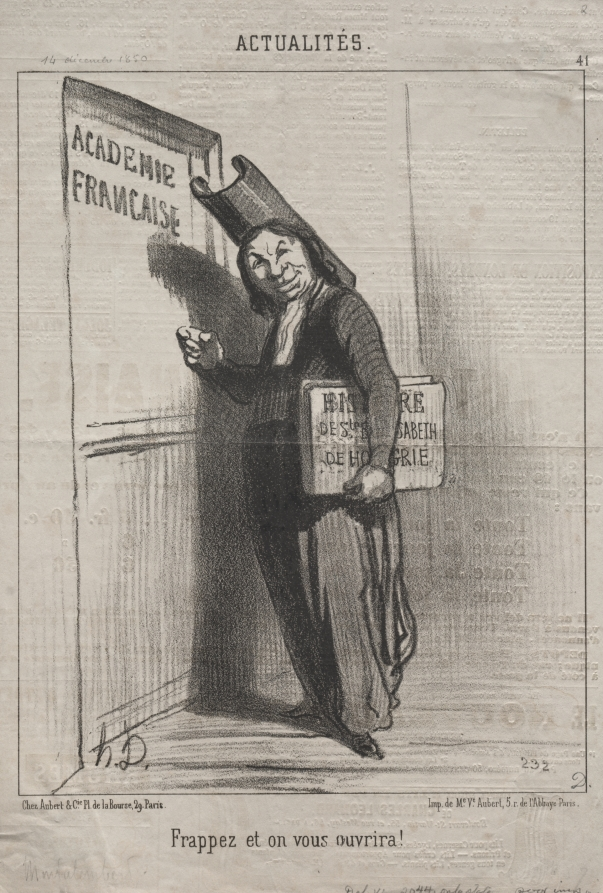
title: Knock and it will open for you!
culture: France, 19th century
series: News of the Day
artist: Honoré Daumier (French, 1808–1879)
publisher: Aubert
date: 1850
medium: lithograph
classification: Print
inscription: Upper margin, pencil: 14 dicembre 1850 / 2 ; Lower margin, pencil: Mandalemberd? / Del. VI. 2044, only state poor imp 46.200 ; Lower margin, printed: Chez Aubert & Cie. Pl. de la Bourse, 29. Paris. / Imp. de MeVe. Aubert, 5 r. de l'Abbaye Paris.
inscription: Above image, printed: ACTUALITÉS. / 41 ; Below image, printed: Frappez et on vous ouvrira!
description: This print was published in Le Charivari (December 14, 1850) as plate 41 from the series News of the Day.